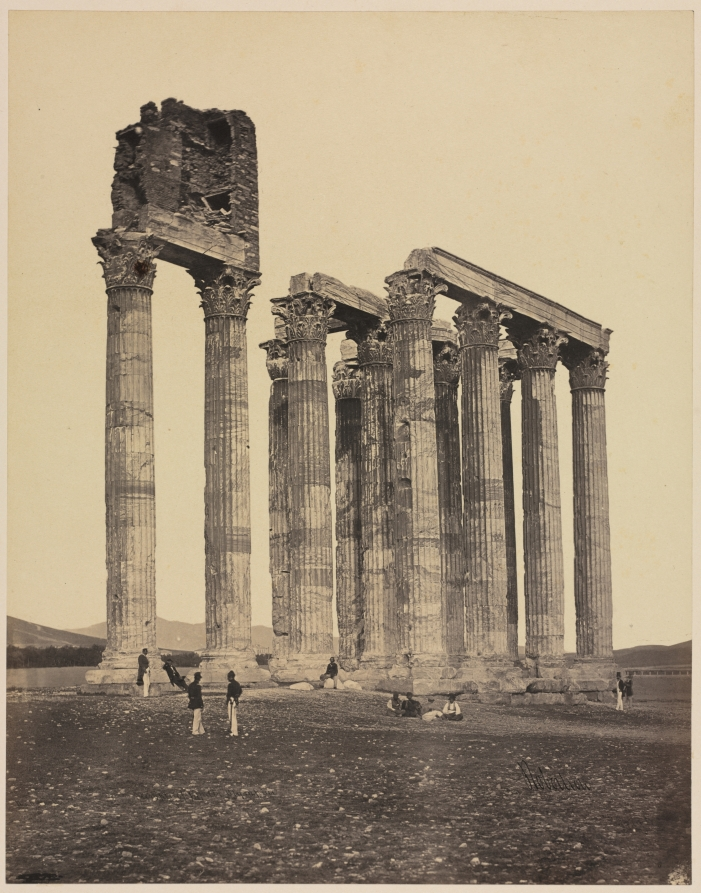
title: Temple of Jupiter Olympius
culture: England, 19th century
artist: James Robertson (British, 1813 (?)-aft 1865)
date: c. 1853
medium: albumen print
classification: Photograph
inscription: Written in ink in lower right corner of image: "Robertson (signed)" Written in ink in lower left corner of image: "Temple of Jupiter Olympius no26" Written in pencil on mount: "RB 16" Written in blue ink on mount: "A37" Written in brown ink on mount: "Olympieum" Erased inscription visible on mount: "23/3 (circles around the numbers) Written in pencil on mount: "x"